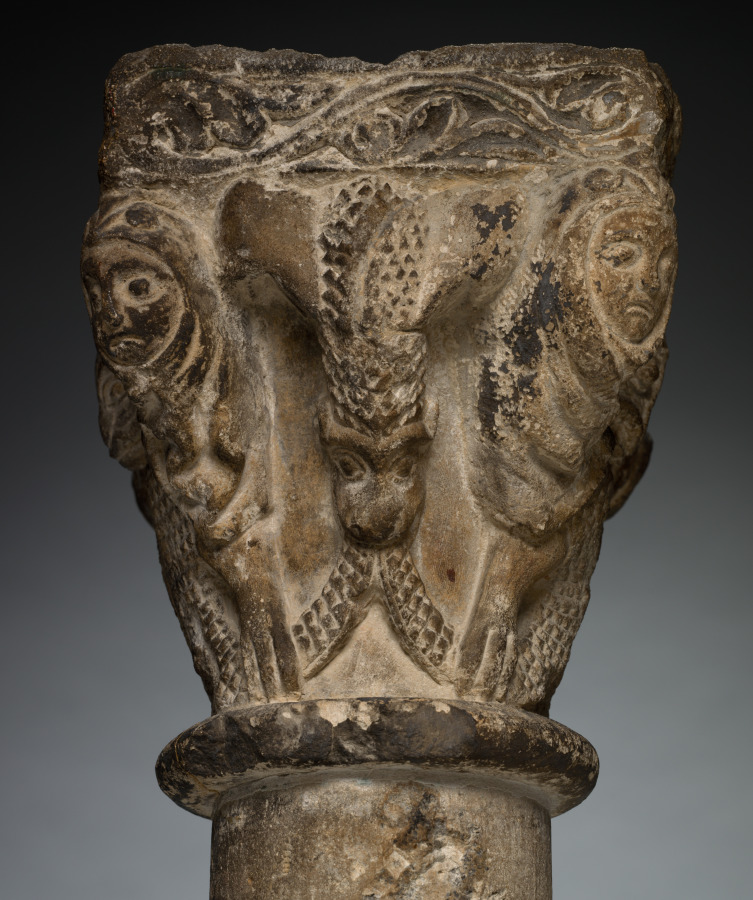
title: Capital with Addorsed Harpies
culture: Southwest France, Languedoc, Toulouse (?), 13th century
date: 1200s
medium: limestone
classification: Sculpture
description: Monstrous images were prevalent in the decoration of religious buildings during the Middle Ages. Such images must have impressed, perhaps even terrified, the monks and visitors who spent much of their time within the cloister or church, a place of prayer, contemplation, and reflection. Scholars have speculated how such images would have been received by the people given the ubiquity of monsters in medieval society. The carved monsters, often symbolizing vice and retribution for sin, were possibly designed to provoke a range of emotional responses including laughter, wonder, surprise, fear, and shock. This striking imagery must have had a strong impact, which in turn led Saint Bernard of Clairvaux (1090–1153), the spiritual head of the Cistercian order, to admonish their use as distracting from prayer.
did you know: A harpy is part bird and part woman featured often in Greek mythology.